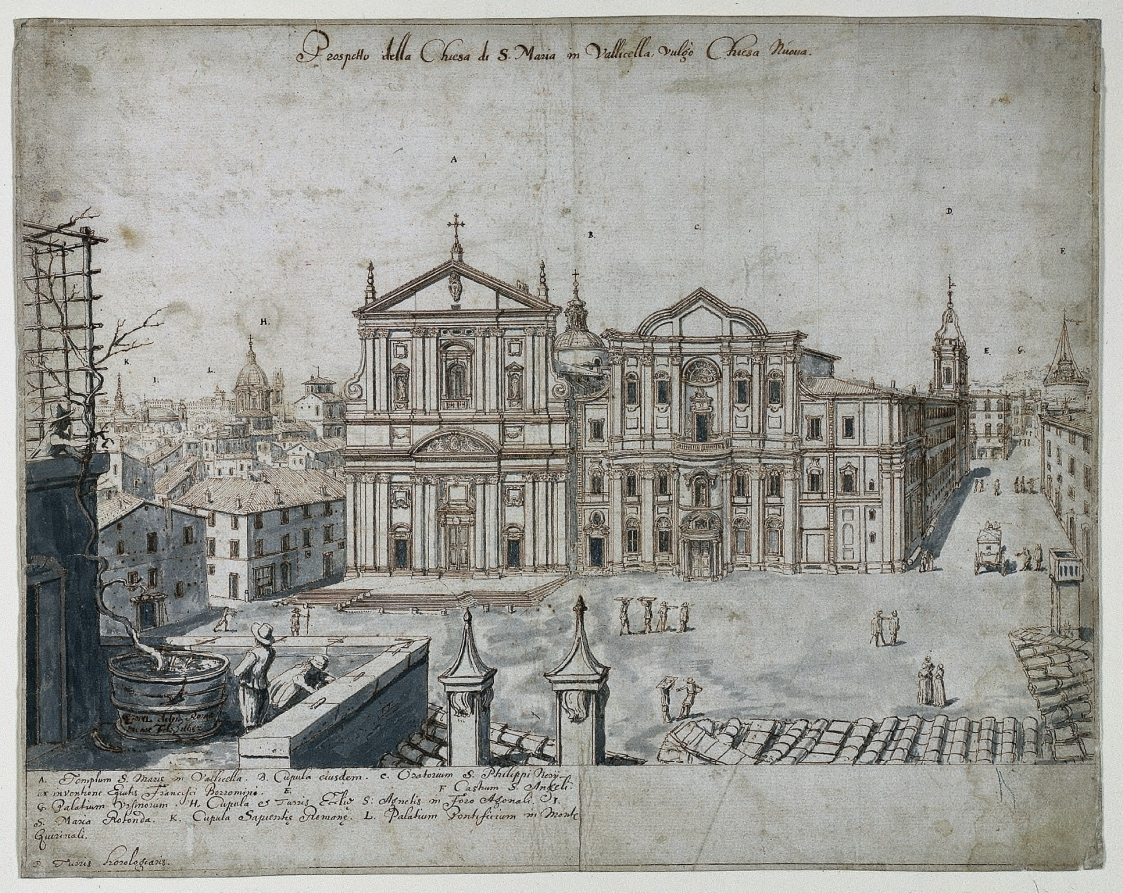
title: Eighteen Views of Rome: The Church of Santa Maria in Vallicella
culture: Flanders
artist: Lievin Cruyl (Flemish, c. 1640-c. 1720)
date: 1665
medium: pen and brown ink and brush and gray wash over graphite; framing lines in brown ink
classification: Drawing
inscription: signed, lower left, in brown ink: [artist's monogram: LC] RVYL delin Romæ / mense Febr. 1665. ; by artist, upper center, in brown ink: Prospetto della Chiesa di S. Maria in Vallicella vulgò Chiesa Nuova ; by artist, throughout composition, in brown ink: [the letters A-L] ; by artist, lower left, in brown ink: A. Templum S. Mariæ in Vallicella. B. Cupula eiusdem. C. Oratorium S. Phiilippi Nerij / ex inventione Equitis Francisci Borromini. E. F. Castrum S. Angeli. / G. Palatium Ursinorum. H. Cupula et Turris Eccliæ S. Agnetis in Foro Agnoli. I. / S. Maria Rotonda. K. Cupula Sapientiae Romanae. L. Palatium Ponteficium in Monte / Quirinali. / D. Turris horologiaris ; VERSO, upper left, in black chalk: 545 ; ON STRIPS OF PAPER MOUNTED TO VERSO, lower center, in graphite: A20979 ; lower right, in graphite: E. 13